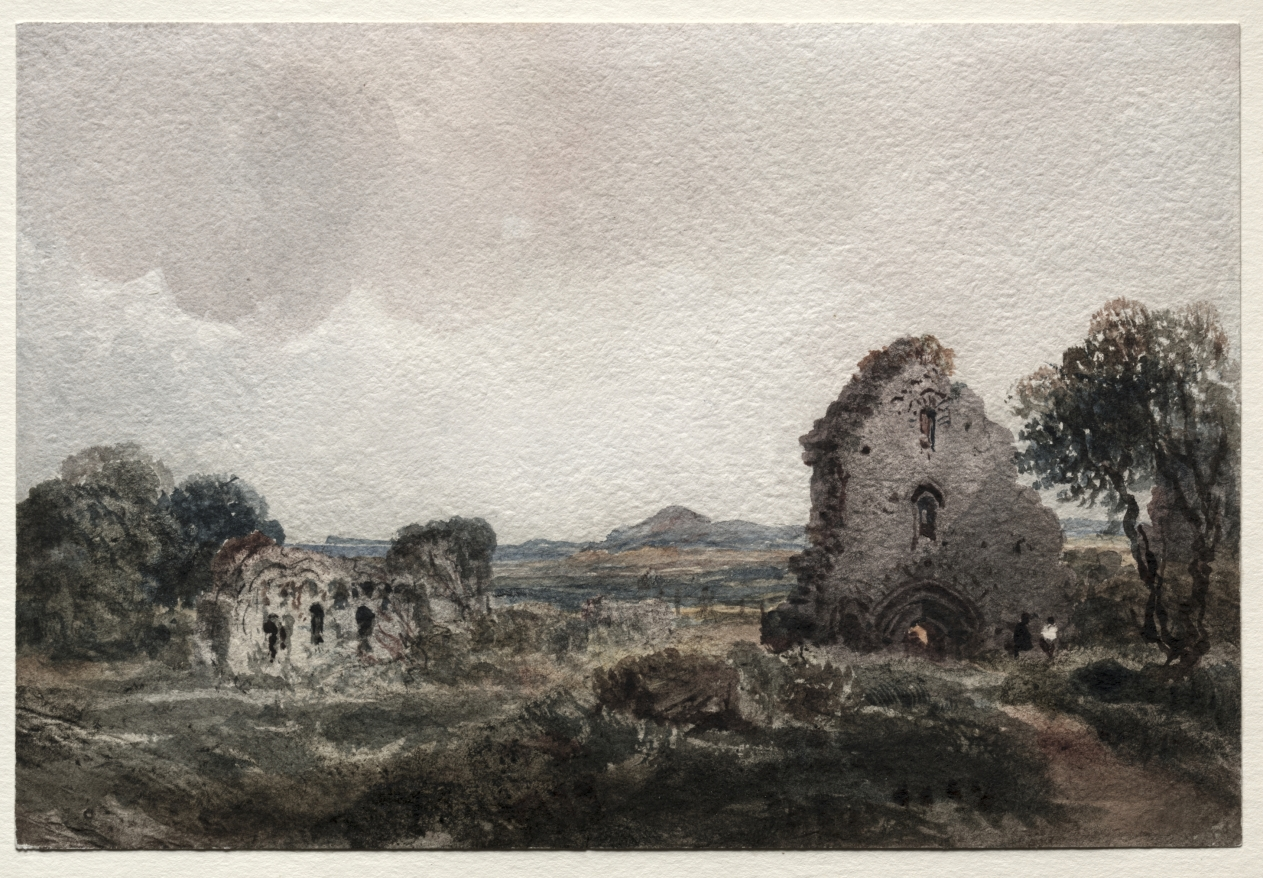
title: Neath Abbey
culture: England, 19th century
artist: Peter De Wint (British, 1784–1849)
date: c. 1840s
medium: watercolor with traces of graphite underdrawing and scratch-away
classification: Drawing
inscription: inscribed, in graphite, on verso: P. DeWint / Near North South Wales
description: Among the key artists of the golden age of watercolor painting in England, Peter DeWint was known for his panoramic views of spacious, seemingly commonplace landscapes rendered in broad washes of earth-tone hues. This drawing depicts the ruins of Neath Abbey, a Cistercian monastery established in the early 12th century in south Wales. From the Tudor period there was industrial activity around the abbey, and by the time DeWint was painting the priory, the Neath Abbey Iron Company had engulfed the environs of the church with copper smelting and manufacture. DeWint chose to omit evidence of the transformation of the area and its role in the Industrial Revolution.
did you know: Peter DeWint traveled abroad only once, to Normandy, and was disappointed with the landscape outside of his native England.